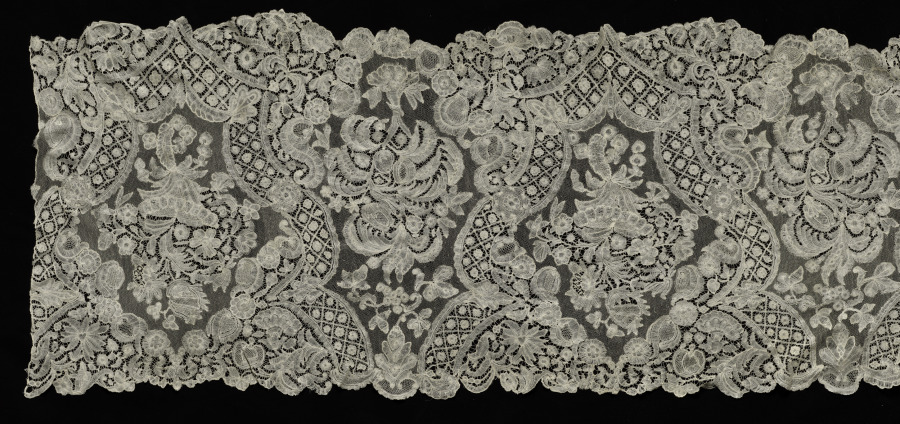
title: Lace Flounce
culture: Belgium, Brabant(?)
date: 1740–60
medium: Linen: bobbin lace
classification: Lace